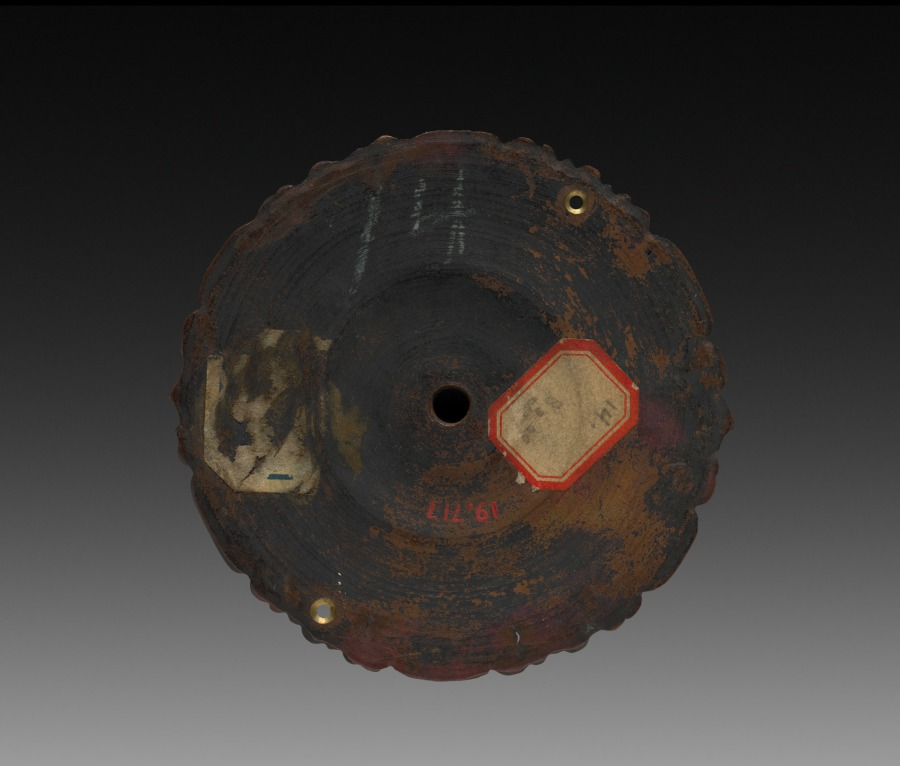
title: Ornamental Detail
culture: France, 18th century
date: 1775–1799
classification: Metalwork